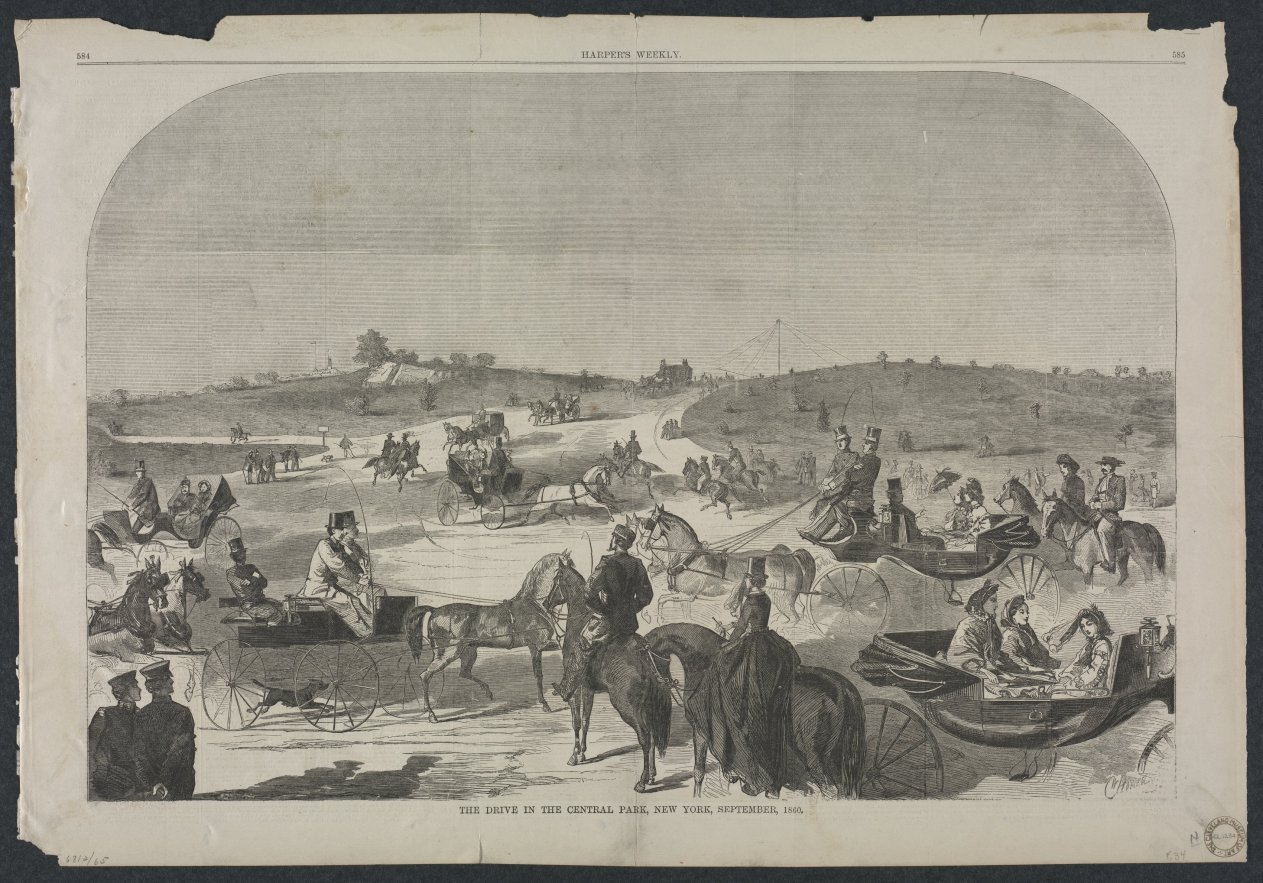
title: The Drive in Central Park, New York, September, 1860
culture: America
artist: Winslow Homer (American, 1836–1910)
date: 1860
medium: wood engraving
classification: Print